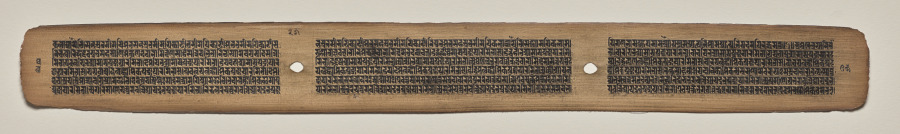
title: Text, Folio 25 (verso), from a Manuscript of the Perfection of Wisdom in Eight Thousand Lines (Ashtasahasrika Prajnaparamita-sutra)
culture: Eastern India, Bihar, Vikramashila Monastery. Painting: Nepal, Kathmandu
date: Sunday, September 14, 1119 (year 239 of the Newar Samvat in the month of Ashvina)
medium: gum tempera and ink on palm leaves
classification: Painting